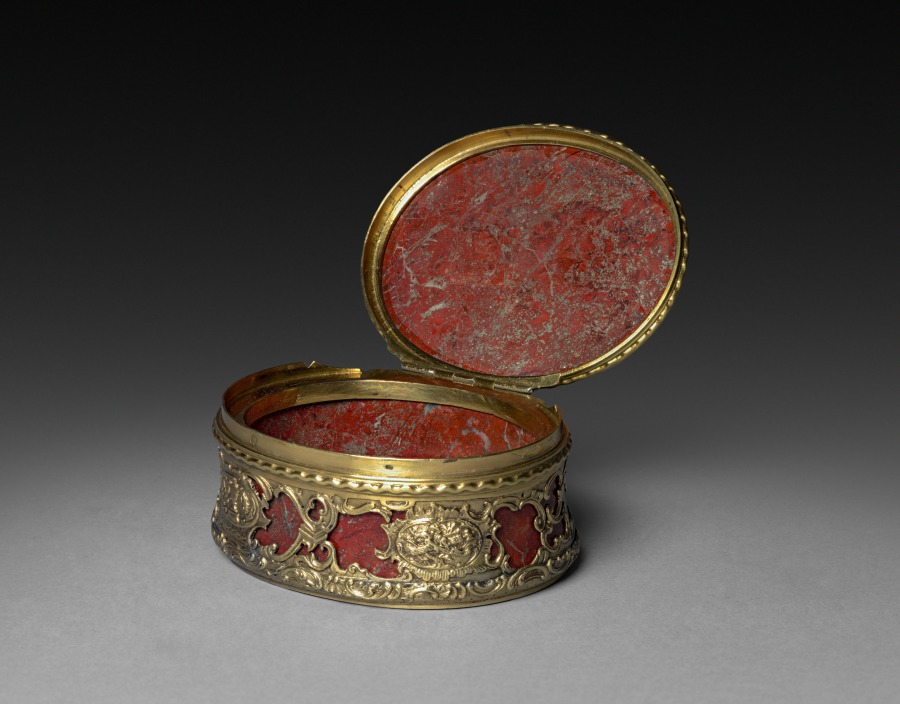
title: Box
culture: Austria, Vienna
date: late 1800s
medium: silver gilt and hardstone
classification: Metalwork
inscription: "3A"; head of Diana, Vienna marks in use since 1872. Maker's mark in an oval punch, first letter "B," second difficult to read, perhaps "P," mark for Bruder Pollak (Neuwirth, p. 116).